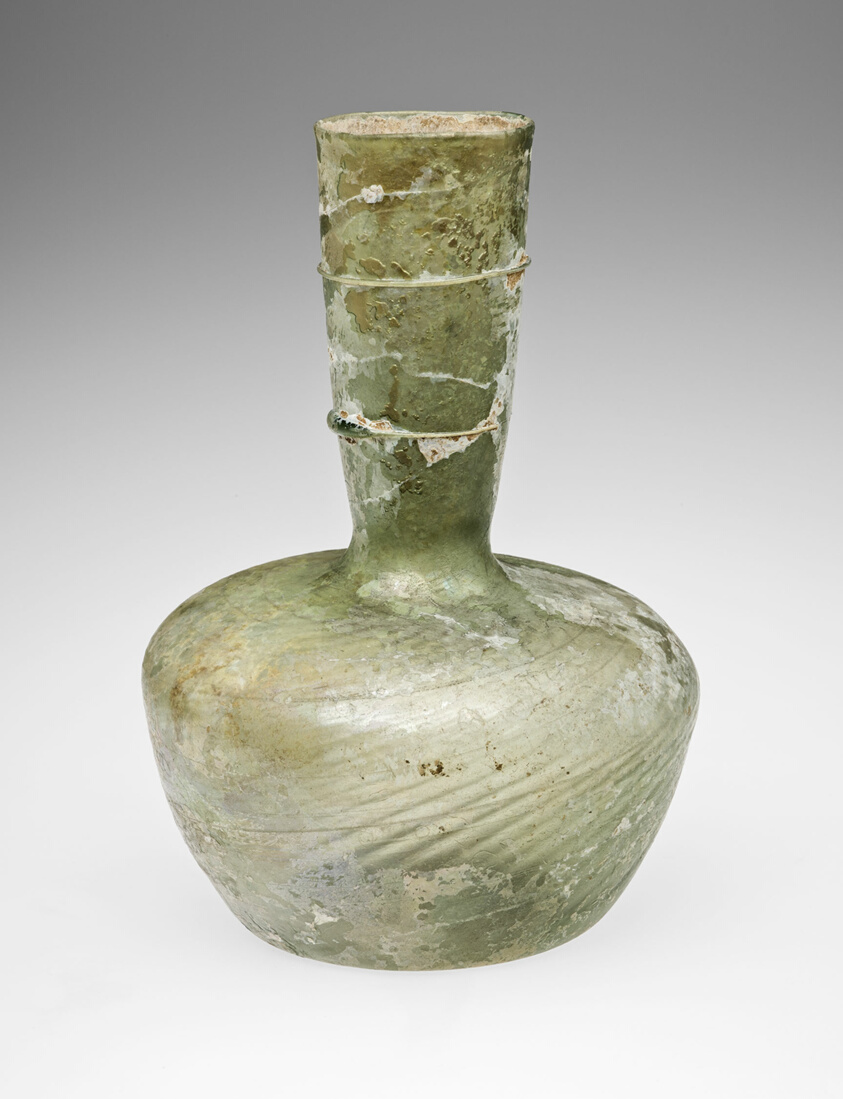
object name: Vessel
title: Bottle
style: roman (ancient, style or period)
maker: Roman; probably coast of ancient Syria or Palestine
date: Late 3rd-4th century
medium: Glass, mold-blown technique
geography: Roman Empire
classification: bottle; vessel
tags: bottles